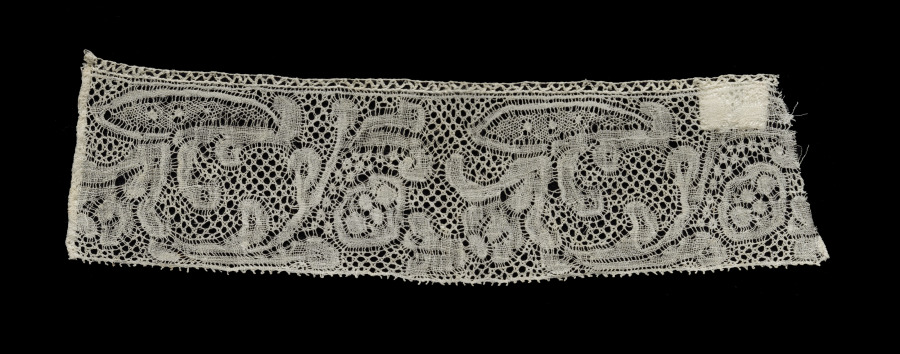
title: Lace Edging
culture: Belgium, Binche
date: 1700s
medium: Linen: bobbin lace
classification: Lace